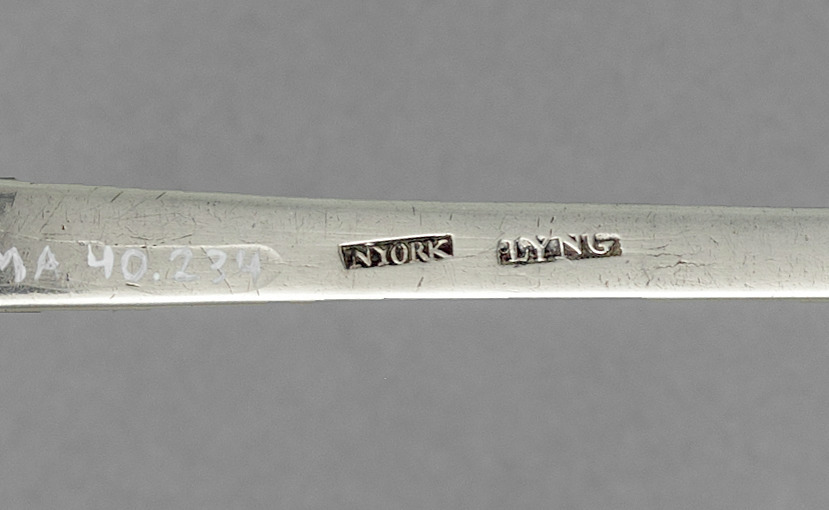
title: Soup Ladle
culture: America, New York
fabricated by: John Burt Lyng (American, 1785)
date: c. 1780–1785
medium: silver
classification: Silver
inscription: engraved "SMR" in script on top of handle end.